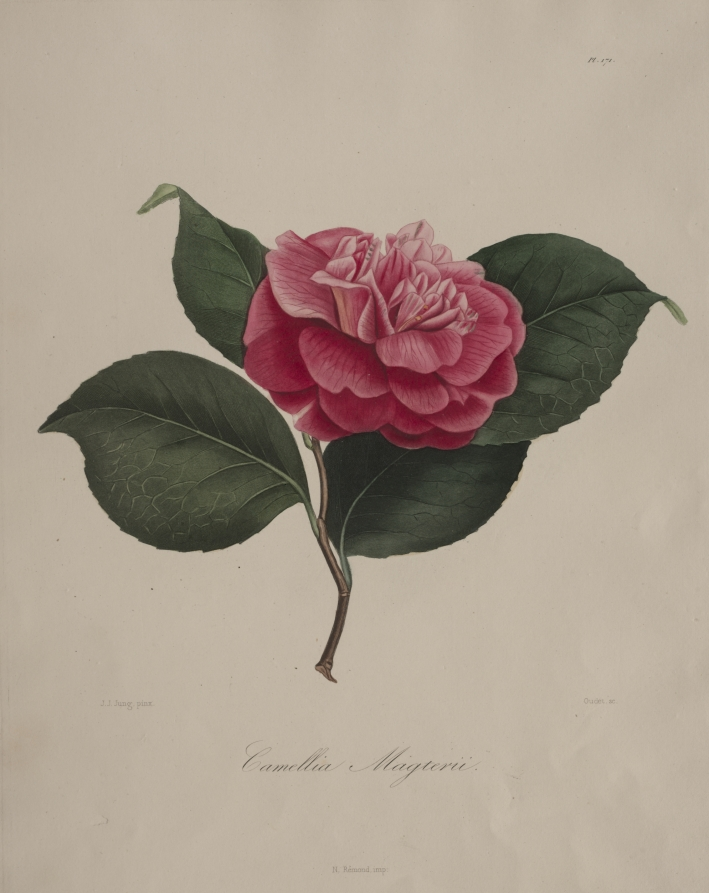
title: Iconographie du genre camellia: No. 171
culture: France, 19th century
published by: Abbé Laurent Berlèse (French)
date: 1839–1843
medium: stipple and line engraving, with hand coloring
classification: Print